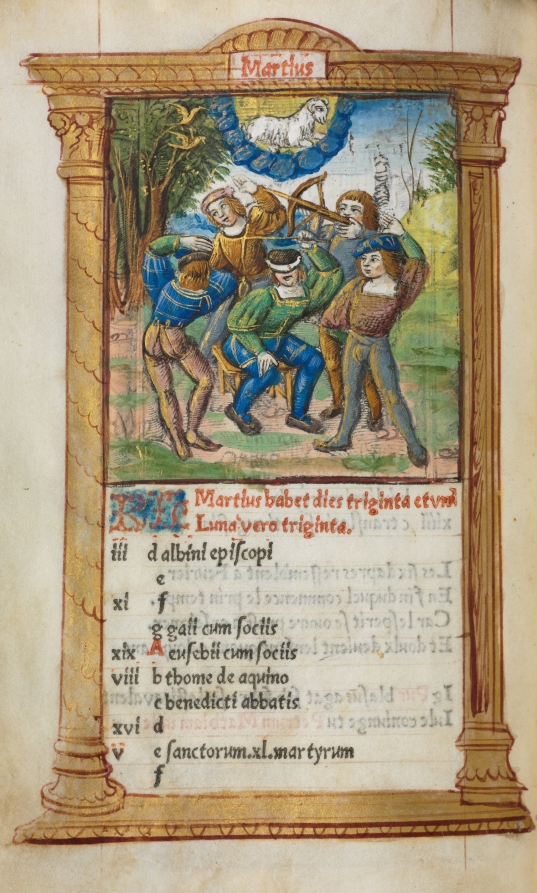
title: Printed Book of Hours (Use of Rome): fol. 4v, March calendar illustration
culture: France, Paris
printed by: Guillaume Le Rouge (French, Paris, active 1493–1517)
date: 1510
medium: 112 Printed folios on parchment, bound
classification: Bound Volume